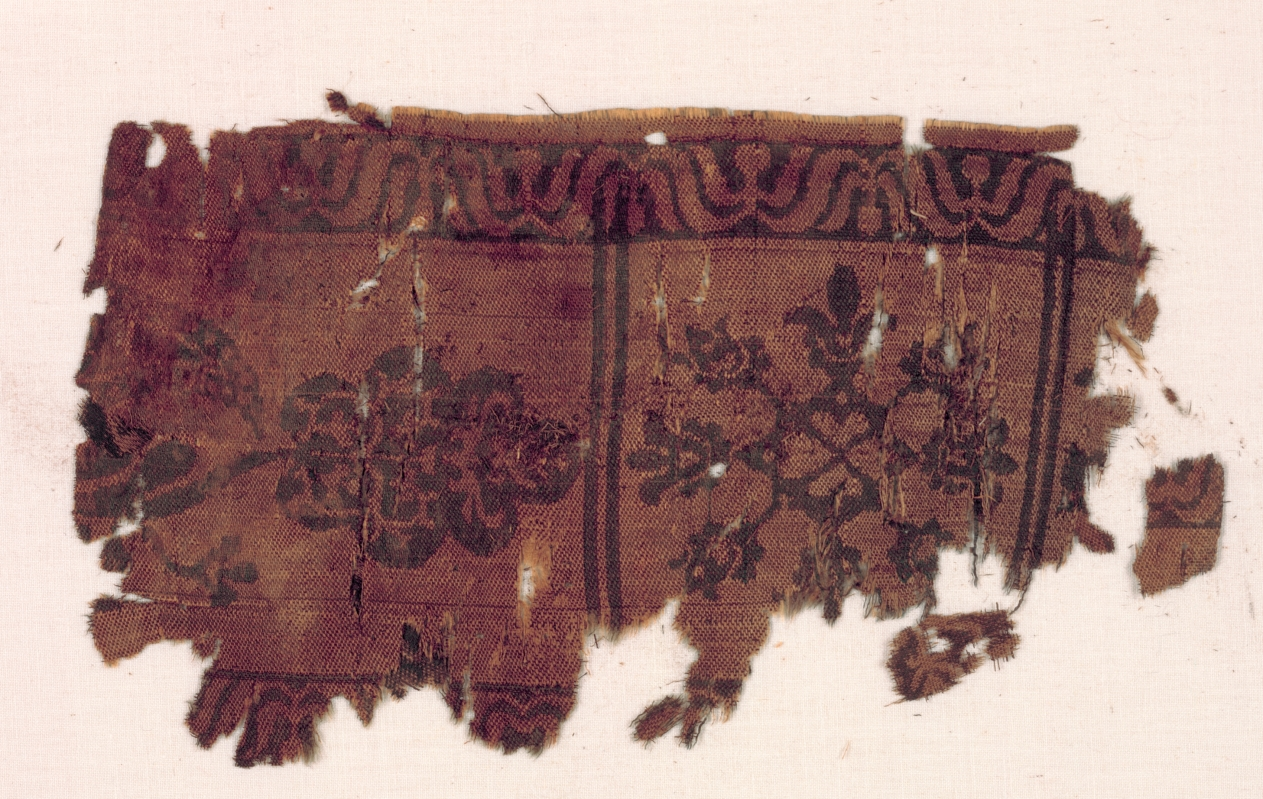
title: Fragment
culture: Egypt or Syria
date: 400s–1100s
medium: silk: compound twill weave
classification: Textile